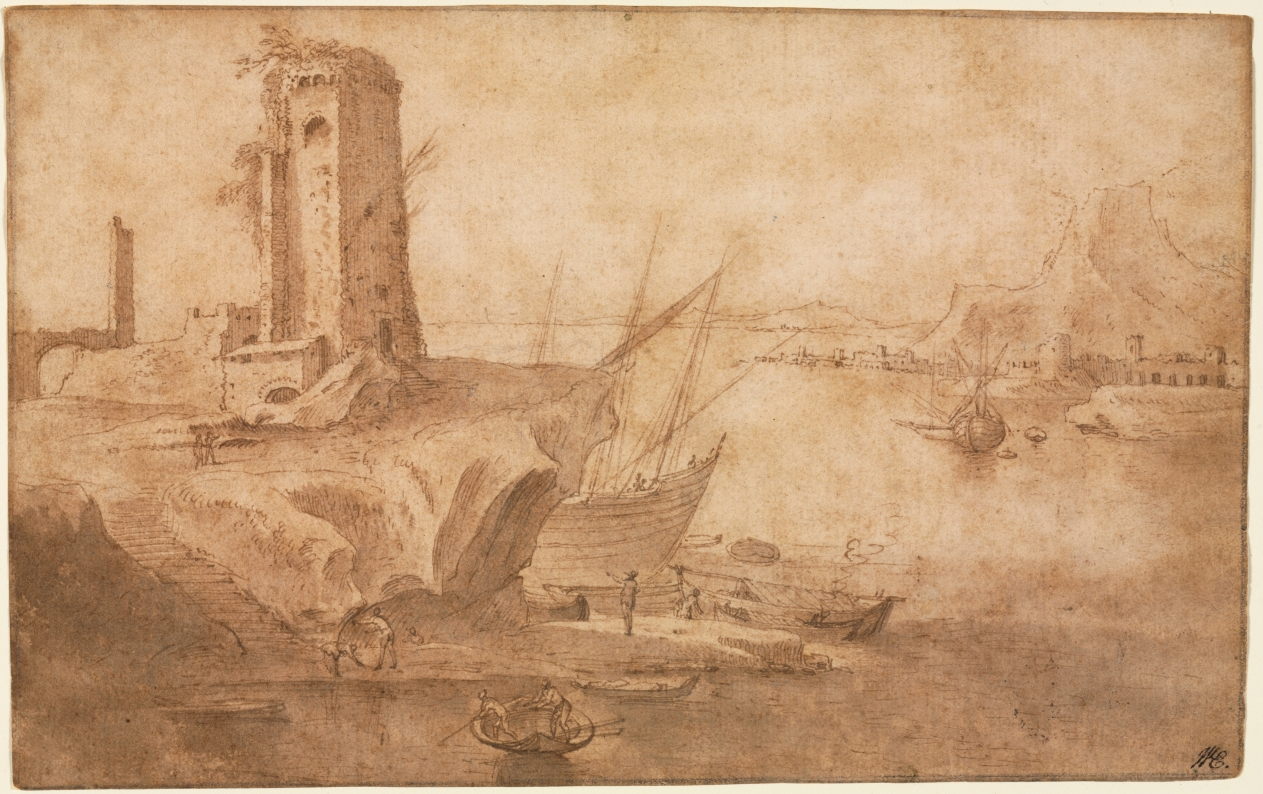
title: Landscape with Tower at Seashore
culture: Italy, 17th century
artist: Filippo Napoletano (Italian, c. 1587-c. 1629)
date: 1600–1614(?)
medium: pen and brown ink and brush and brown and gray wash over traces of graphite; framing lines in graphite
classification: Drawing